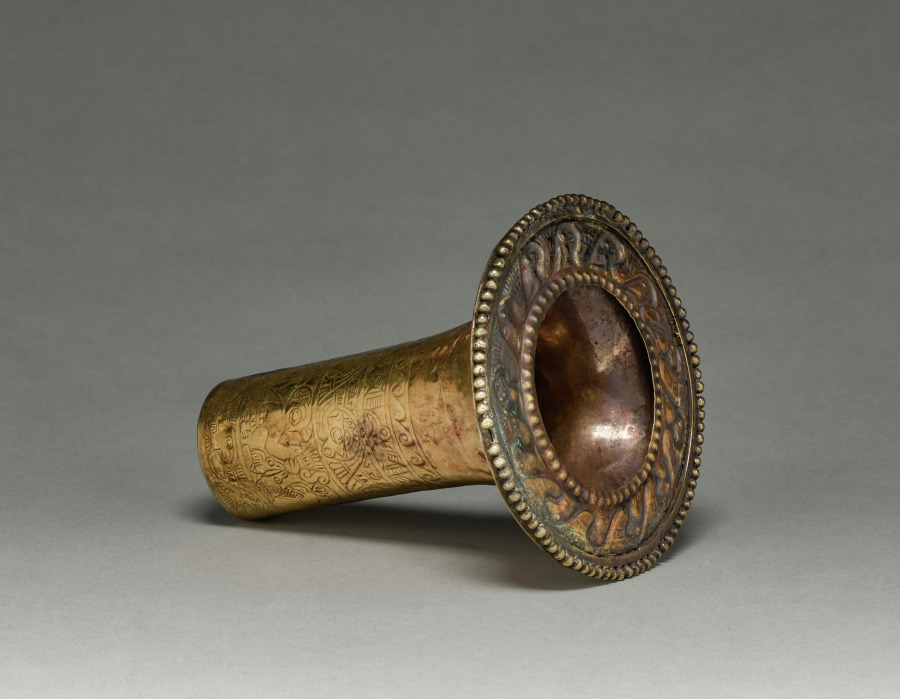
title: Ear Flare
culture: Peru, North Coast, Chimú style (900-1470)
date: 900–1470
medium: hammered gold alloy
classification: Metalwork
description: North Coast ear ornaments typically have a long shaft that balanced the weight of the glorious frontal. This pair illustrates Chimú interest in the sea, which had great economic and religious importance. On the shafts are bands of seabirds and waves, and a similar pattern edges the frontals, which were altered in modern times. Originally solid disks, the frontals' centers were cut out and a dotted band was added to the rim.